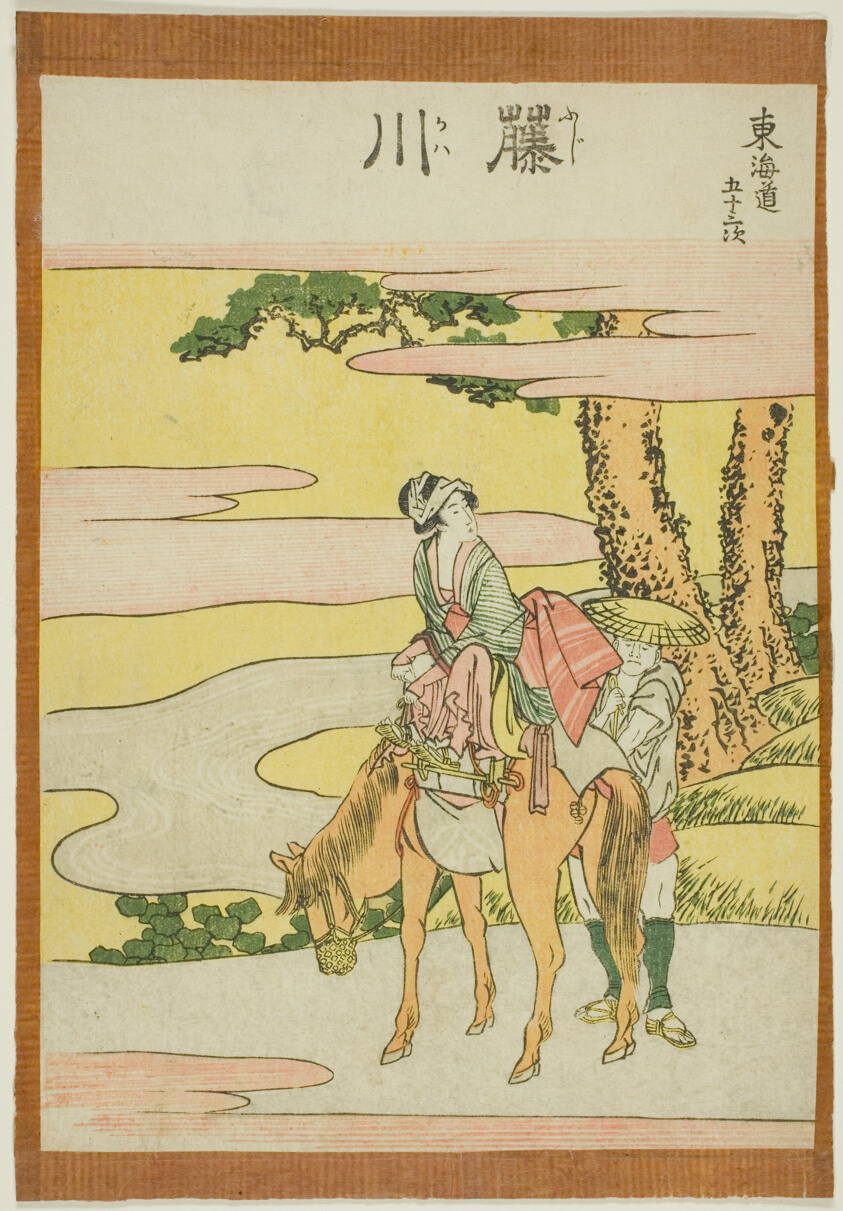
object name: Print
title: Fujikawa, from the series "Fifty-three Stations of the Tokaido (Tokaido gojusan tsugi)"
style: Japanese (culture or style)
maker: Katsushika Hokusai 葛飾 北斎; Japanese, 1760-1849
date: c. 1806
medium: Color woodblock print; chuban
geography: Japan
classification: woodblock print; print; asian art